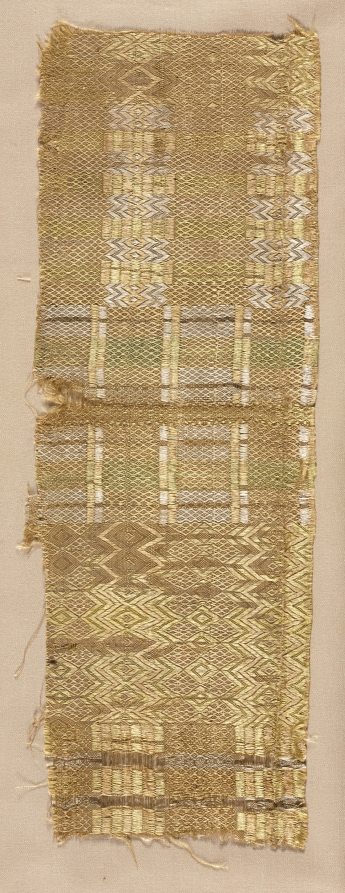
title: Silk Fragment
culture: Spain, Mudejar, 13th century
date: 1200s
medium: tabby weave: silk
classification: Textile